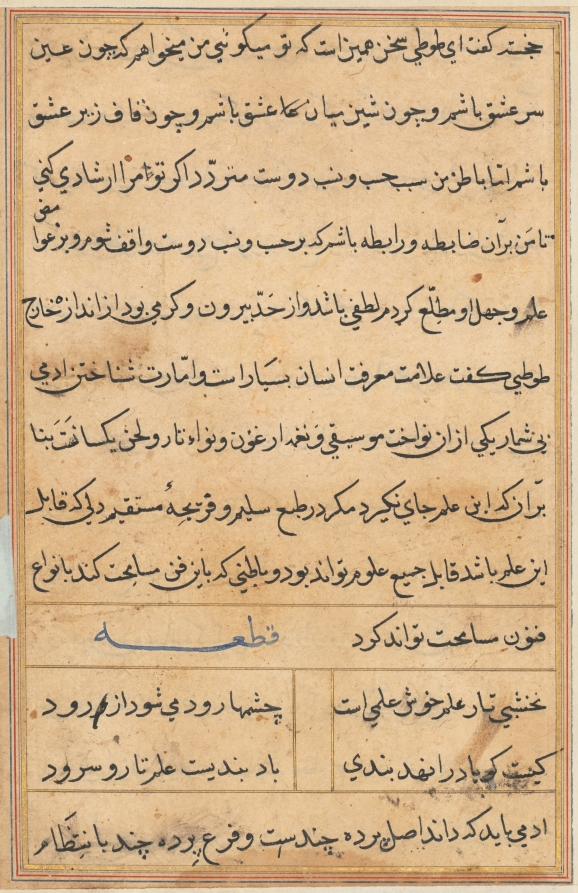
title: Page from Tales of a Parrot (Tuti-nama): text page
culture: Mughal India, court of Akbar (reigned 1556–1605)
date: c. 1560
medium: gum tempera, ink, and gold on paper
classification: Painting